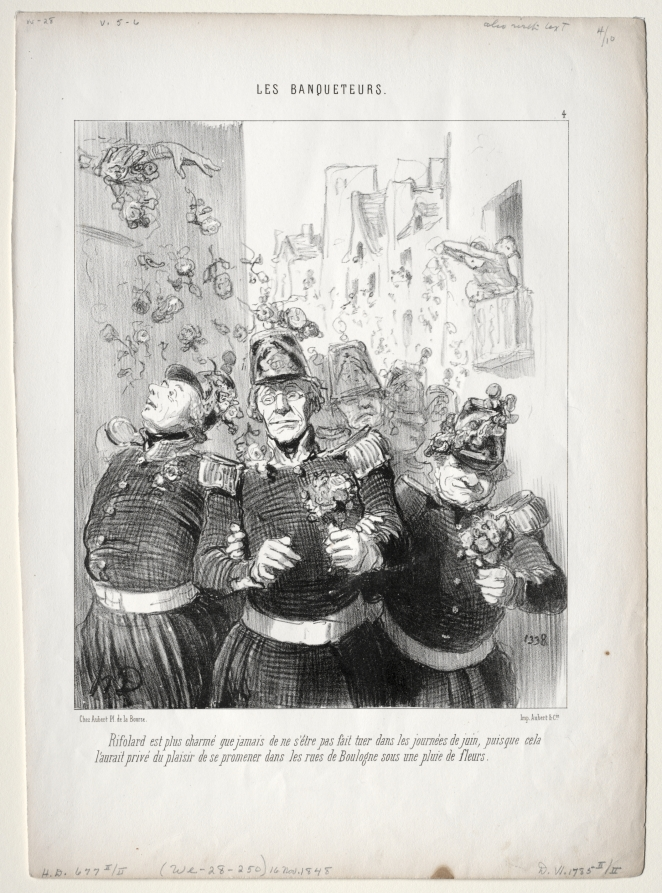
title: Rifolard is more delighted than ever...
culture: France, 19th century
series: The Banqueters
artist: Honoré Daumier (French, 1808–1879)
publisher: Aubert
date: 1848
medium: lithograph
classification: Print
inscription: Above image, printed: LES BANQUETEURS. / 4 ; Below image, printed: -Rifolard est plus charmé que jamais de ne s'être pas fait tuer dans les journées de juin, puisque cela / l'aurait privé du plaisir de se promener dans les rues de Boulogne sous une pluie de fleurs.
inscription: Upper margin, in pencil: W-25 V. 5-6 / also with text 4/10 ; lower margin, printed: Chez Aubert, Pl. de la Bourse, 29 Paris / Imp. de Aubert & Cie. ; in pencil: H.D. 677 II/II / (We-28-250) 16 Nov. 1848 / D. VI.1785 II/II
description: This print was published in Le Charivari (November 16, 1848) as plate 4 from the series The Banqueters.